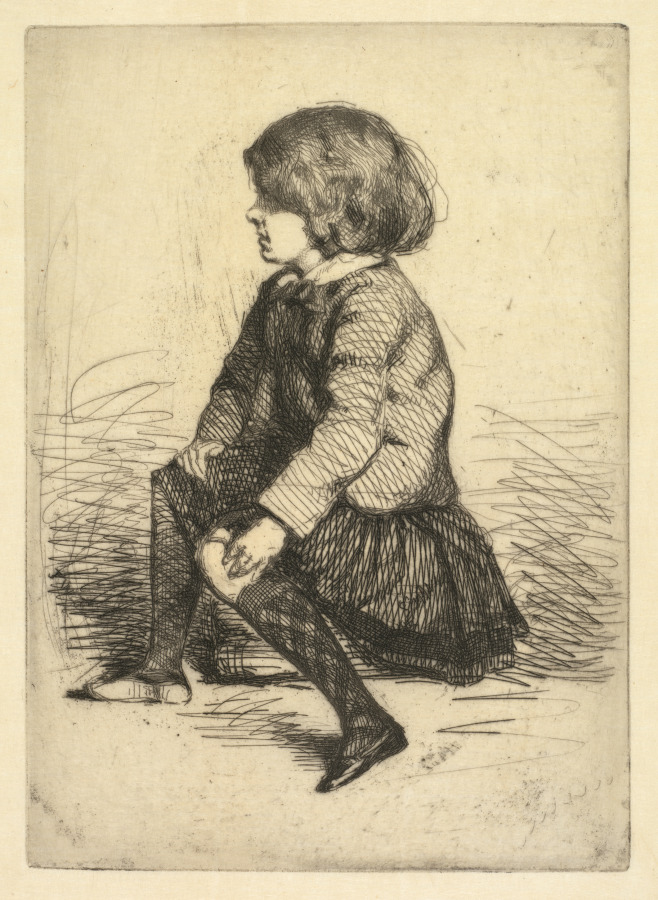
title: Seymour Haden Jr., Seated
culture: America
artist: James McNeill Whistler (American, 1834–1903)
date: 1857–58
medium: etching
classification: Print